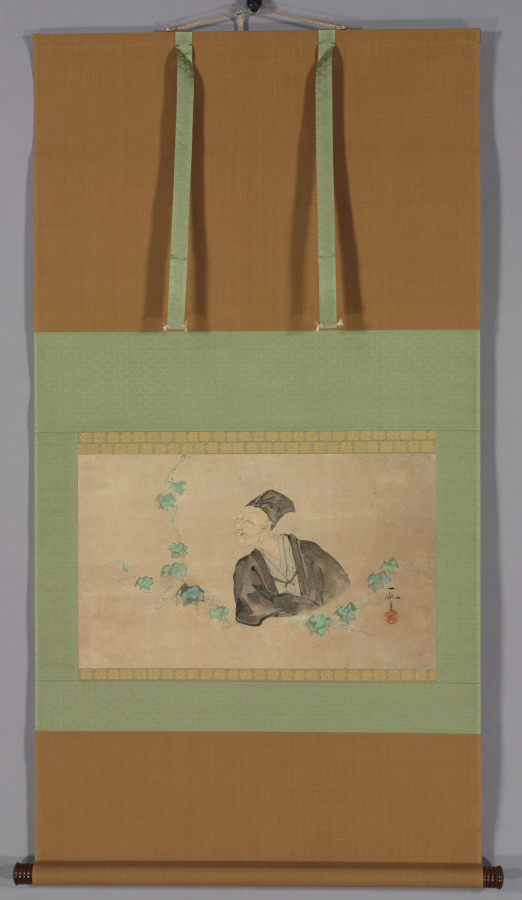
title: Portrait of Basho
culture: Japan, Edo period (1615–1868)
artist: Ichijun (Japanese, active 1700s)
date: 1700s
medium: hanging scroll; ink and color on paper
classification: Painting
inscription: 一純筆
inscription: 一純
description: The 15th-century poet Matsuo Basho is still considered Japan’s greatest master of the haiku poem, a short, 17-syllable verse form that relates some aspect of nature to the human experience. Although he was one of the most celebrated men of his day, he pursued a simple life of self-imposed poverty and solitude. In this portrait, Ichijun alluded to Matsuo’s haiku about the transient life: warau beshi naku beshi, waga asagao no, shibomu toki (to smile or to cry when my face in the morning [glory] is wilted).